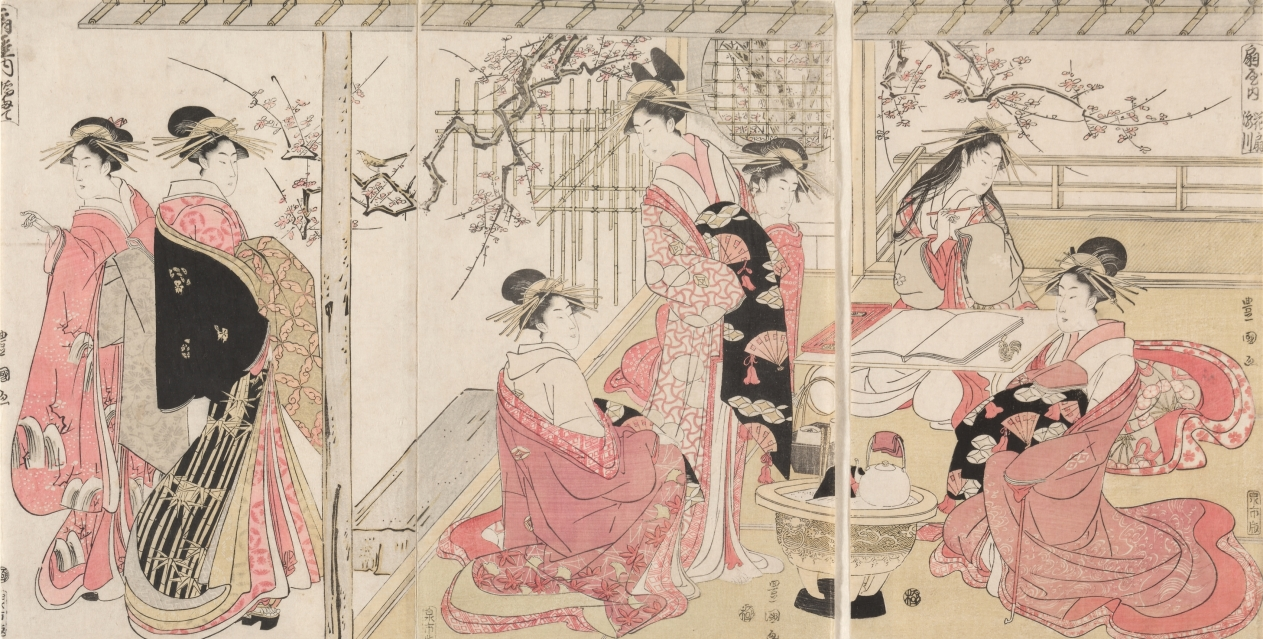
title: Courtesans of the Ōgiya on a Spring Outing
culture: Japan, Edo period (1615–1868)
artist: Utagawa Toyokuni (Japanese, 1769–1825)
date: mid- or late 1790s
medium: Triptych of woodblock prints, ink and color on paper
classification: Print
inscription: Signature: Toyokuni ga.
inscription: Publisher: Izumiya Ichibei (Senichi han). Censorship Seal: kiwame.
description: In these prints, two courtesans of the Ōgiya brothel are entering an open pavilion, while another group gathers around a Japanese hibachi inside. Hanaōgi, the most celebrated courtesan of Ōgiya in the late 1700s, is depicted at a desk. Holding a brush in her hand, she turns her head to one side as if gathering her thoughts before writing in the book before her. Both her position and her loosened hair separate Hanaōgi from her courtesan companions who wear elaborate coiffures. This depiction of her captures both her knowledge of poetry and her skill as a calligrapher.